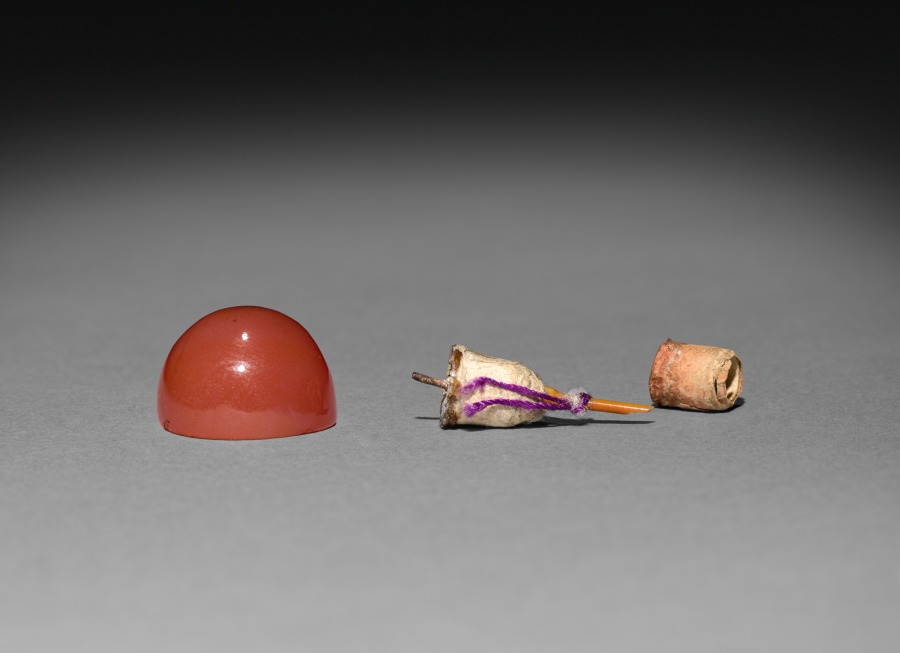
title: Snuff Bottle (stopper)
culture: China, Qing dynasty (1644-1911)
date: 1644–1911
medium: glass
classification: Glass